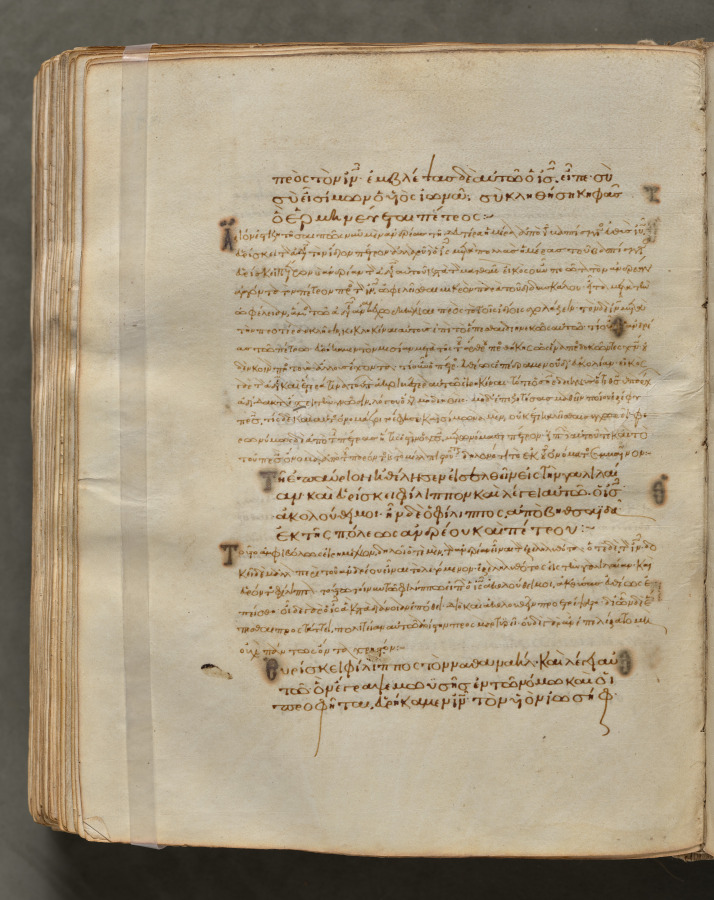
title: Text, folio 328 (verso), from a Gospel Book with Commentaries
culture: Byzantium, Constantinople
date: c. 1000–1100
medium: ink, tempera, and gold on vellum; leather binding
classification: Bound Volume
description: Each of the four gospels in this book opens on a page with brilliantly illuminated borders depicting the author of the text as well as birds—principally peacocks, symbols of the immortality of the soul—and fountains, representing the fountain of life and the salvation of the soul. This volume consists of 428 leaves with texts in Greek. Its level of sophistication suggests that it was probably written and decorated in a monastery in Constantinople.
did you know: Gospel books were carried in procession through Byzantine churches.